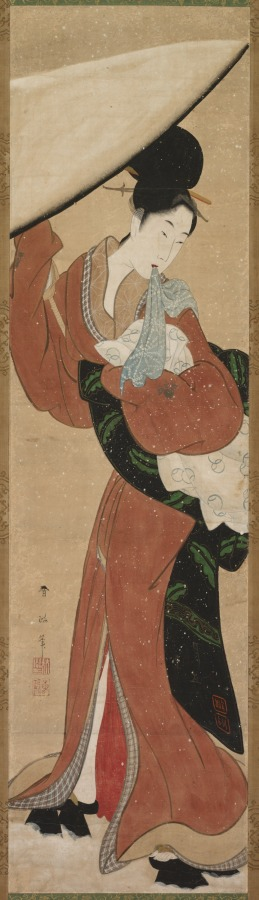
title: Lady with a Parasol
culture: Japan, Edo period (1615–1868)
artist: Koikawa Harumasa (Japanese)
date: early 1800s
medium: hanging scroll; ink, color, gold, and silver pigments on paper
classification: Painting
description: This painting depicts a young woman braving the elements as she hurries home from the local bathhouse. The action depicted accentuates her slender neck and bare legs. In later Japanese art, images of beautiful women in bare feet and a towel between their teeth have sensual overtones.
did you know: Spatters of white paint represent falling snow.